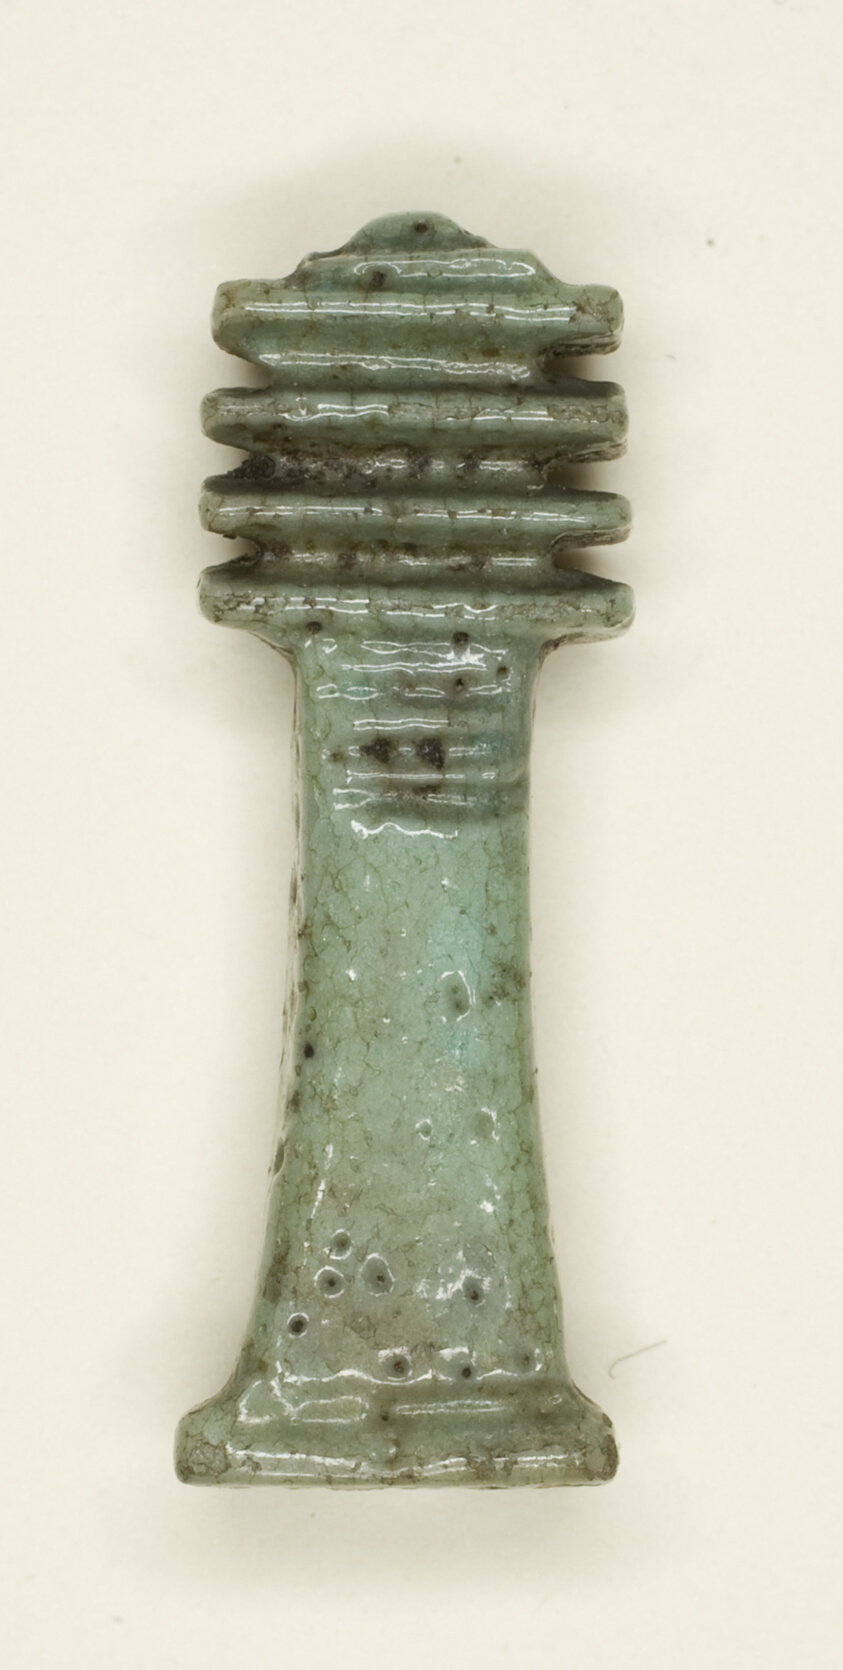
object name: Costume and Accessories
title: Amulet of a Djed Pillar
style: third intermediate period, egyptian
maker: Egyptian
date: Third Intermediate Period–Ptolemaic Period (11th–7th centuries BCE)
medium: Faience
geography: Egypt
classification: amulet; jewelry; ceramics; ancient art; costume; faïence (composite material)